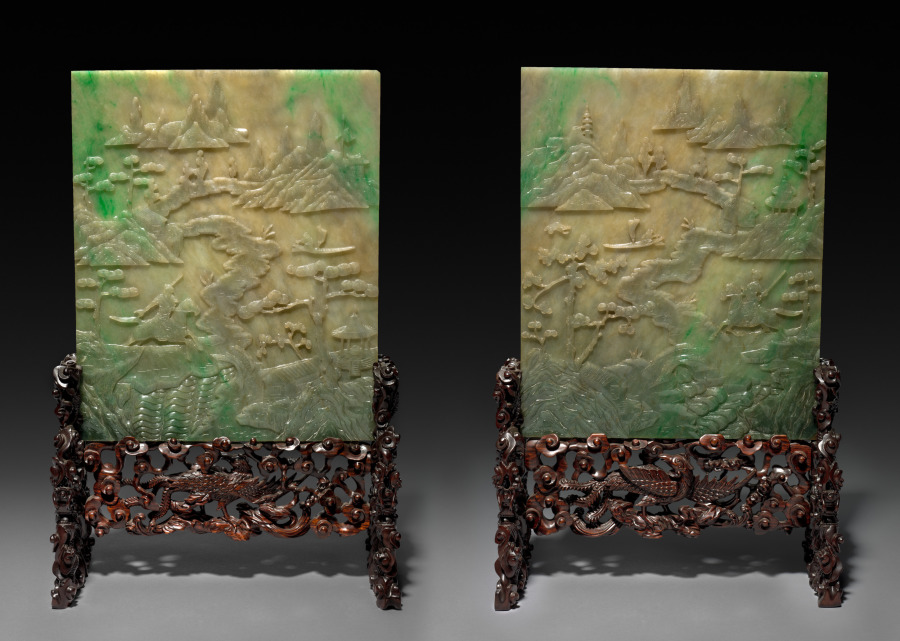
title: Pair of Table Screens with Stands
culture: China, Qing dynasty (1644-1911)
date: 1644–1911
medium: jade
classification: Jade